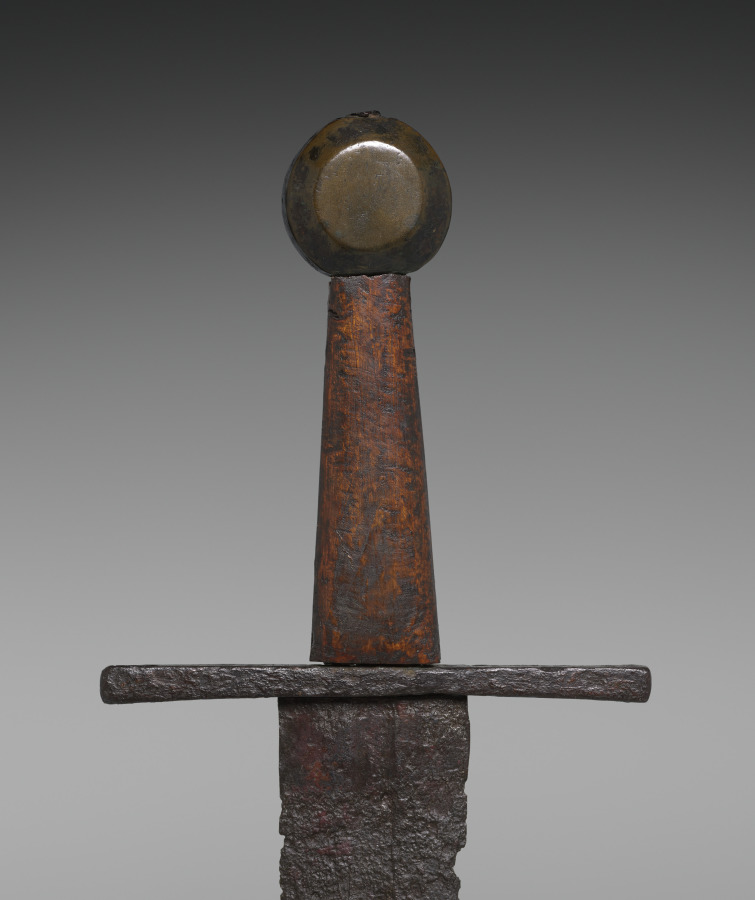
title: Sword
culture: Germany(?)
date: c. 1350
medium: iron; wood grip and brass pommel replacements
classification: Arms and Armor